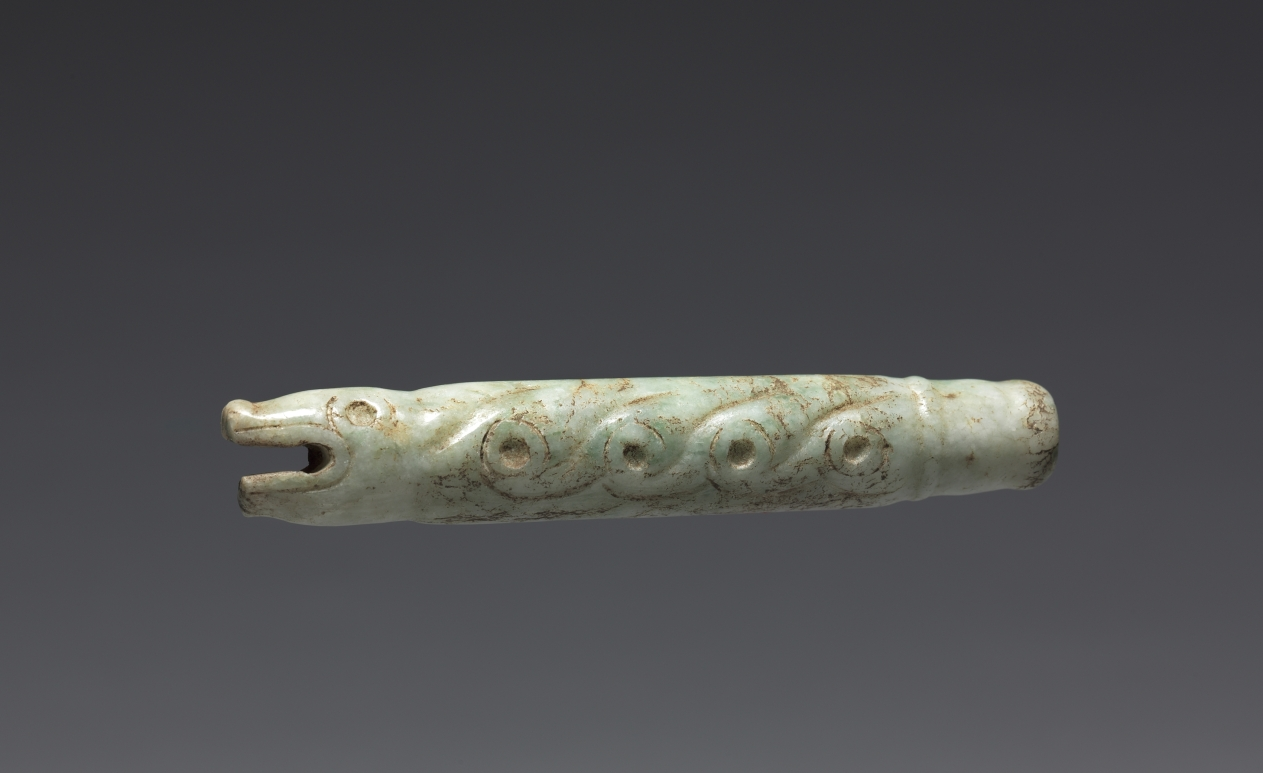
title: Serpent-form Fan Handle(?)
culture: Central Mexico, Mixtec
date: 900–1519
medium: pale green jade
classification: Sculpture